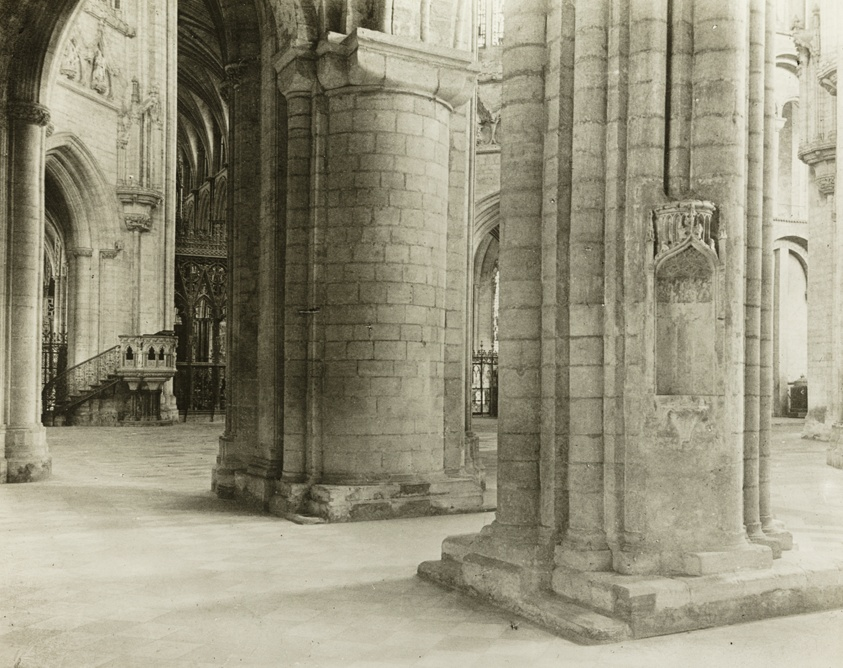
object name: Photograph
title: Ely Cathedral: Octagon to Choir from North Nave Aisle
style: Pictorialism, 19th century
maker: Frederick H. Evans (English, 1853–1943)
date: c. 1891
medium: Lantern slide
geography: England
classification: photograph; photography